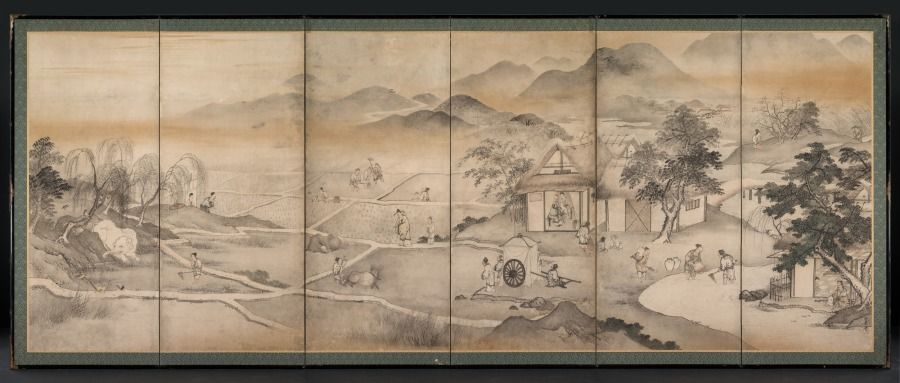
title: Emperor Yao Visiting Yu Chonghua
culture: Japan, Edo period (1615–1868)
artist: Kusumi Morikage (Japanese, active c. 1620–1690)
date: mid- to late 1600s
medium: One of a pair of six-panel folding screens, ink, slight color, and gold on paper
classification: Painting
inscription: signature and seal at lower right.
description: One of a pair, this screen shows a section of the narrative of how the Chinese Emperor Yao (about 2356–2255 BC) selected his successor, Yu Chonghua (about 2294– 2184 BC), who would become Emperor Shun. The artist who painted this screen, Kusumi Morikage, trained with Kano Tan’yō (1602–1647), painter-in-residence to Japan’s shogun, the country’s ruler, and was one of his four top students. Despite the conservative subject matter, Morikage’s distinctive sensibility shines through in his playful treatment of the gray and white elephants in the far left panel of the composition. According to legend, Chonghua was so virtuous that in the spring, elephants bounded down from the mountains to help him till the soil with their tusks.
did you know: The emperor's two-wheeled carriage sits in front of a thatched-roof farmhouse.